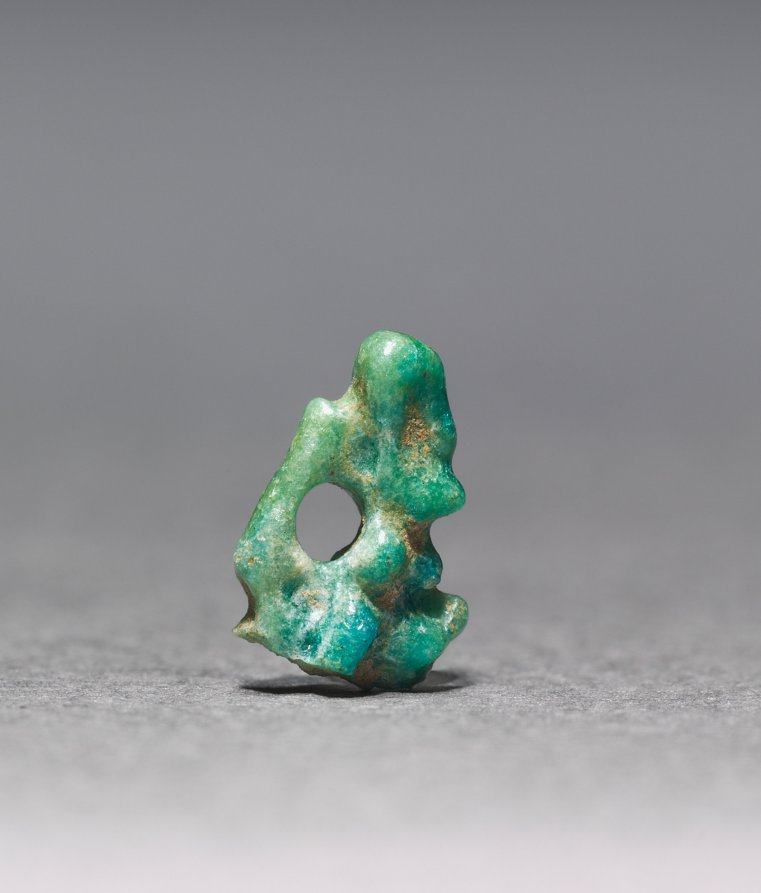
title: Amulet of an Unidentified Shape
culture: Egypt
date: 2123–2040 BCE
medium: turquoise green faience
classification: Amulets